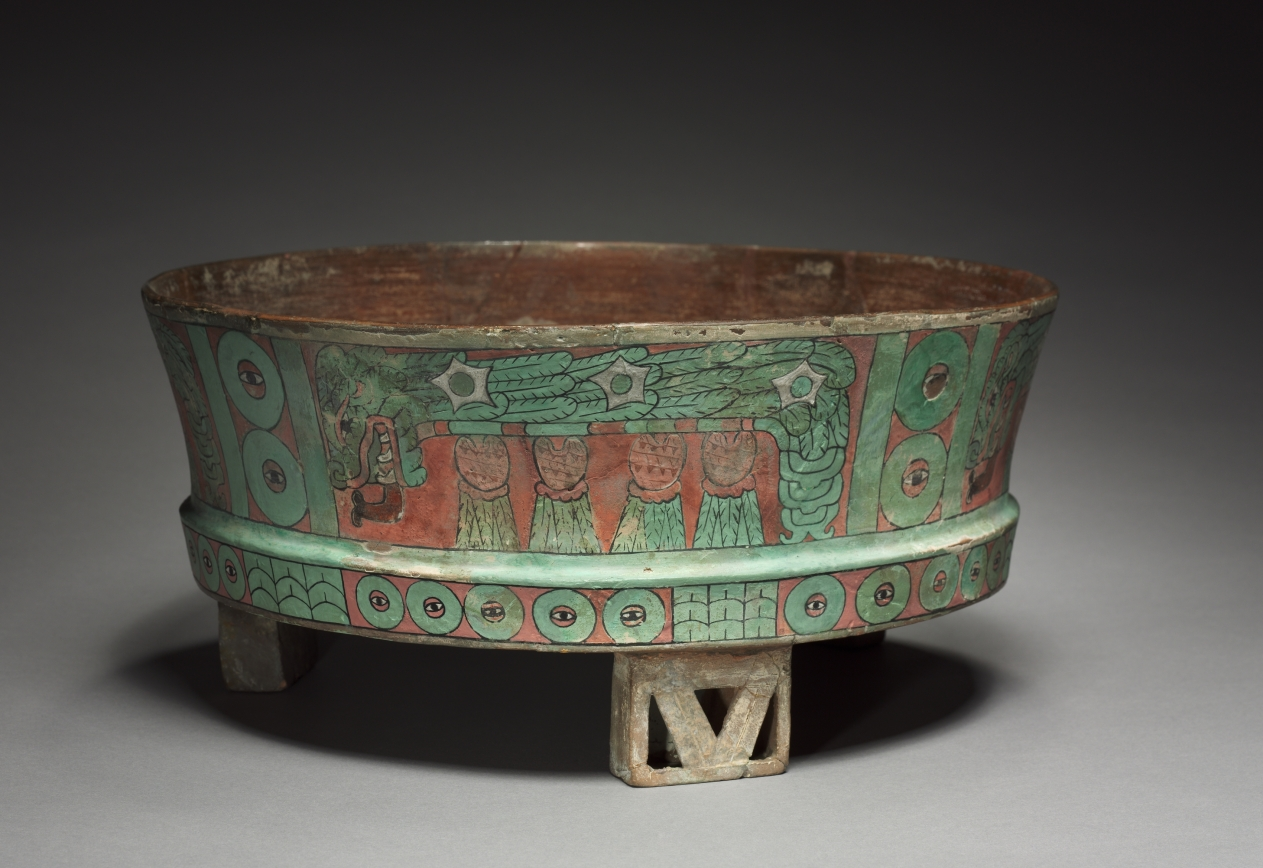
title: Basin with Feathered Serpent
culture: Central Mexico, Teotihuacán style, Classic period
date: 400–550 CE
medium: earthenware, stucco, pigment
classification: Ceramic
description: The serpent covered with the green feathers of the tropical quetzal bird is an image of verdant, bountiful nature and life. It also may be a symbol of rulership, thus linking rulers to cosmic forces and the natural order. Four human hearts lie beneath the serpent on this unusually large basin, suggesting that sacrifice stimulates nature’s fruitfulness.